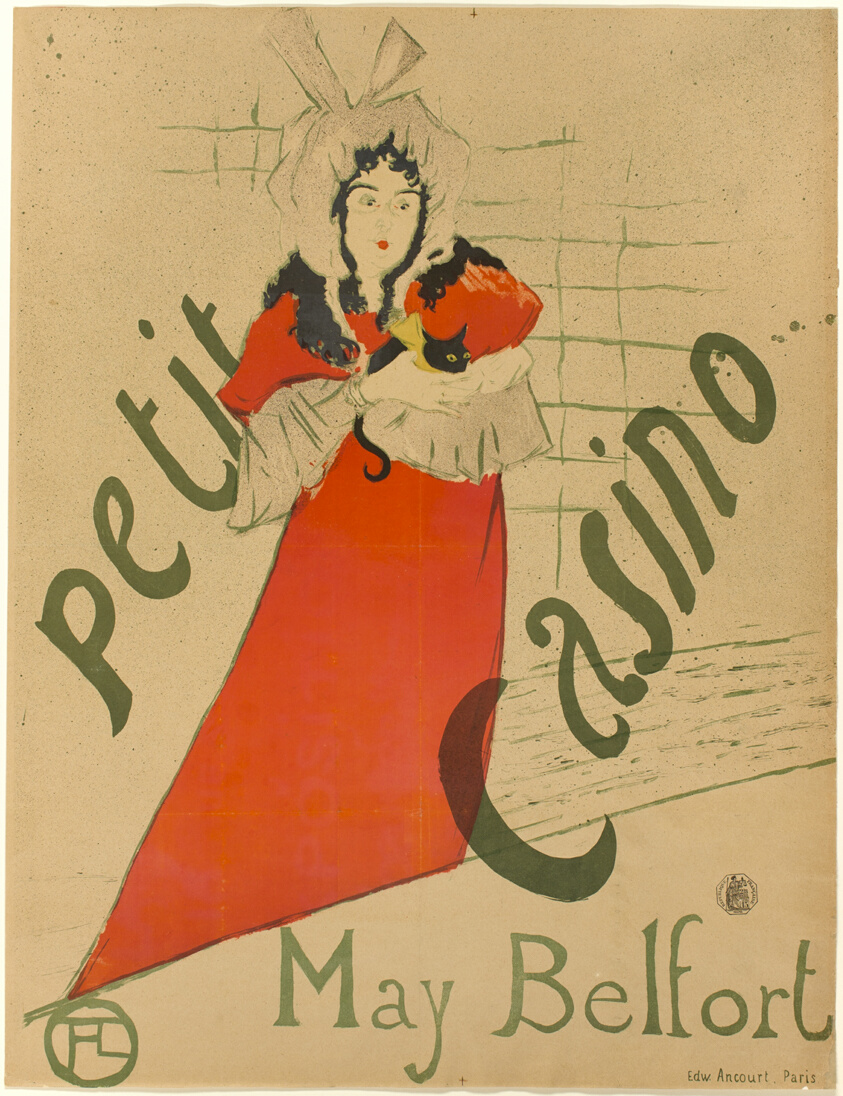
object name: Print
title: May Belfort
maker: Henri de Toulouse-Lautrec (French, 1864-1901)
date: 1895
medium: Color lithograph poster on tan wove paper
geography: France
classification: lithograph; print; prints and drawing; poster